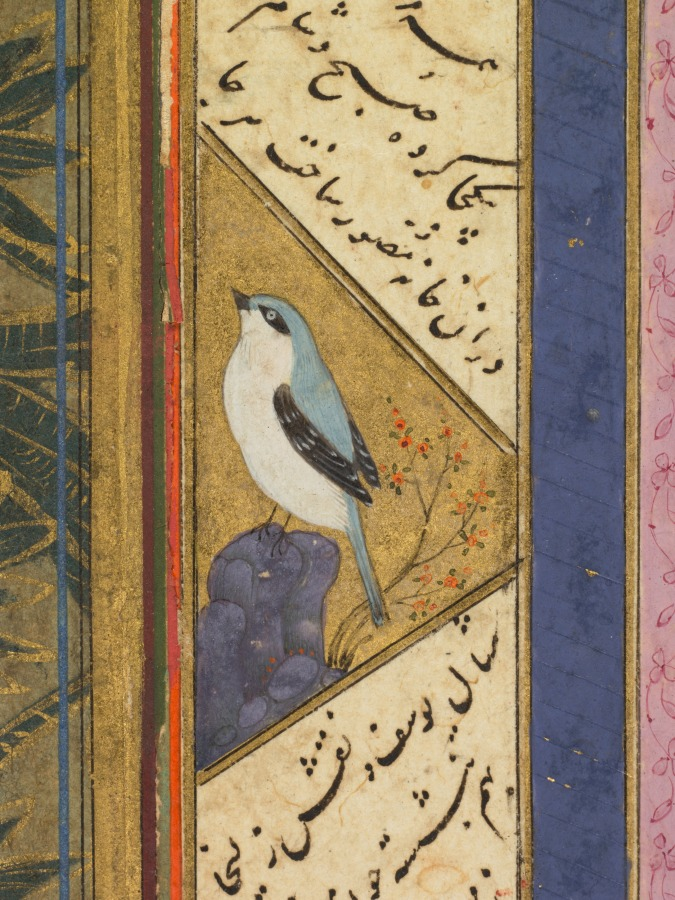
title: Zulaykha in her palace and as an elderly woman with Joseph (recto), from a Panj Ganj (Five Treasures) of Abd al- Rahman Jami (Persian, 1414–1492)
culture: Western Afghanistan, Herat (text); Mughal India (paintings)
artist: Mushfiq (Indian, active early 1600s)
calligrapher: Sultan 'Ali al-Mashadi (Iranian, 1430–1520)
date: 1603–7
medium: Gum tempera, ink, and gold on paper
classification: Painting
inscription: [[Upper left of painting, against a red background, in nasta’liq script]] ' amal - i Mushfiq sana 1015 Text on verso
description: The golden pot of white narcissus flowers at the bottom center of the painting signals that Zulaykha, leaning on her staff to the left, will imminently have her youth and beauty restored. In this Persian retelling of the Old Testament account from the Bible, Zulaykha lusted after Joseph, even though she was already married to Potiphar. Joseph, with the golden halo, resisted her advances until she became a widow and retained his youth, because of his extreme virtue. Above, Zulaykha as a young woman waits for Joseph in her house where murals of them as a happy couple are painted on the walls.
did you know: Zulaykha is shown four times: twice in the murals, seated in the center, and below when she is much older.